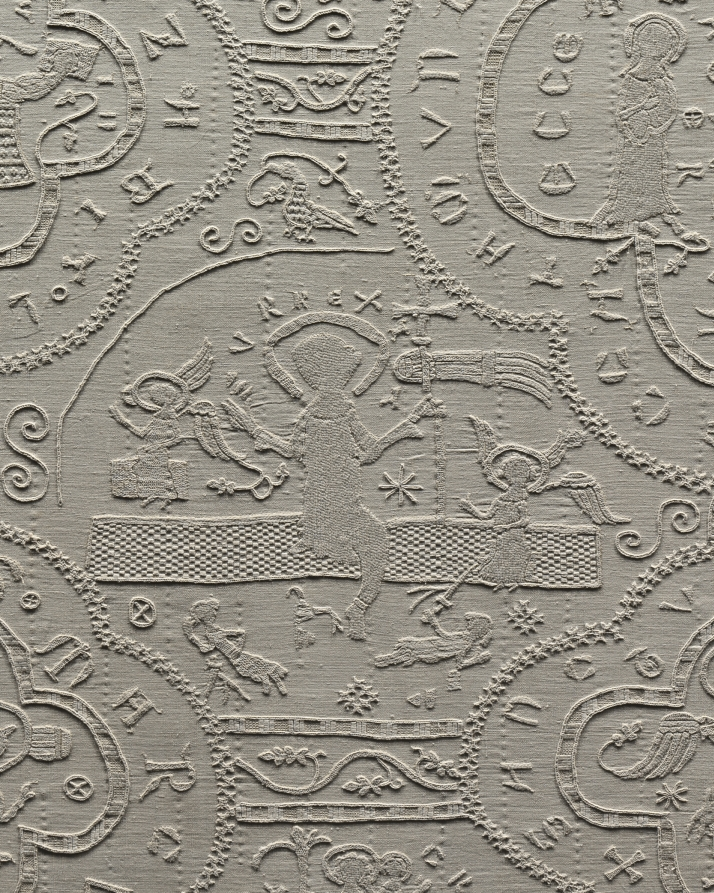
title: Altar Cloth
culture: Germany, Altenberg on the Lahn, Premonstratensian Convent, 14th century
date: c. 1350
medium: embroidery: linen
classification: Embroidery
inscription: various motifs enclosed in quatrefoils with identifying inscriptions in Gothic letters.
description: This large, embroidered altar cloth is one of the rarest, most important medieval church furnishings in existence. It was stitched by nuns in the Premonstratensian Convent in Altenberg on the Lahn River, north of Frankfurt, Germany, and was used to cover the church’s high altar in the weeks leading up to Easter. The cloth is an example of linen embroidery, a specialty of German nuns in the later Middle Ages. The Altenberg monastery church once had valuable furnishings; the high altar retable (a decorated frame with sculptures and paintings on the top of an altar) has survived, the main parts of which are now in the Städel Museum in Frankfurt, Germany.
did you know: When lit from behind, the previously hidden details emerge and the complex design becomes evident.